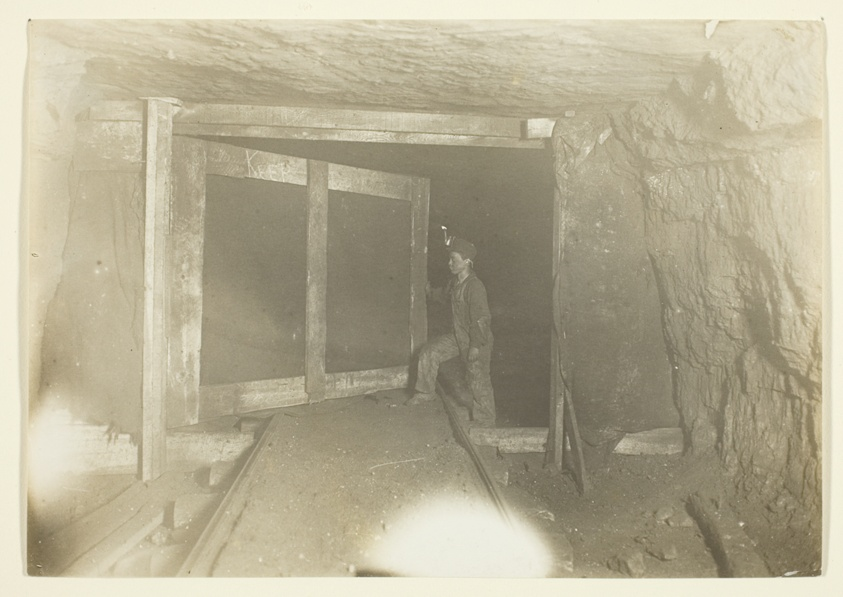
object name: Photograph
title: Young Trapper Boy in West Virginia Coal Mine)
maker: Lewis Wickes Hine (American, 1874–1940)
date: 1908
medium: Gelatin silver print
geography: United States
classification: gelatin silver (developing-out-paper) pr; photographic process; photography; photograph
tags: Collected by Hugh Edwards